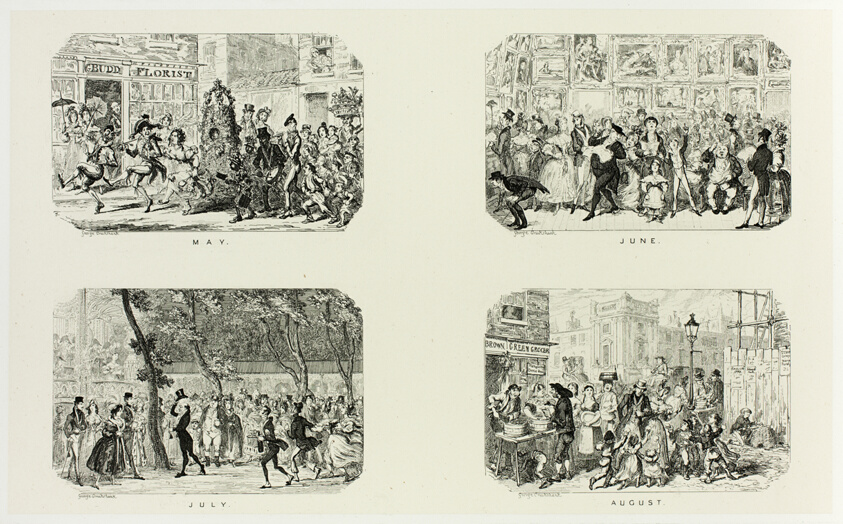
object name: Print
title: May from George Cruikshank's Steel Etchings to The Comic Almanacks: 1835-1853 (top left)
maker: George Cruikshank (English, 1792-1878); published by Pickering & Chatto (English, 19th century)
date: 1835, printed c. 1880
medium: Four steel etchings in black on cream India paper, laid down on off-white card (chine collé)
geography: England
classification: etching; paper; print; prints and drawing